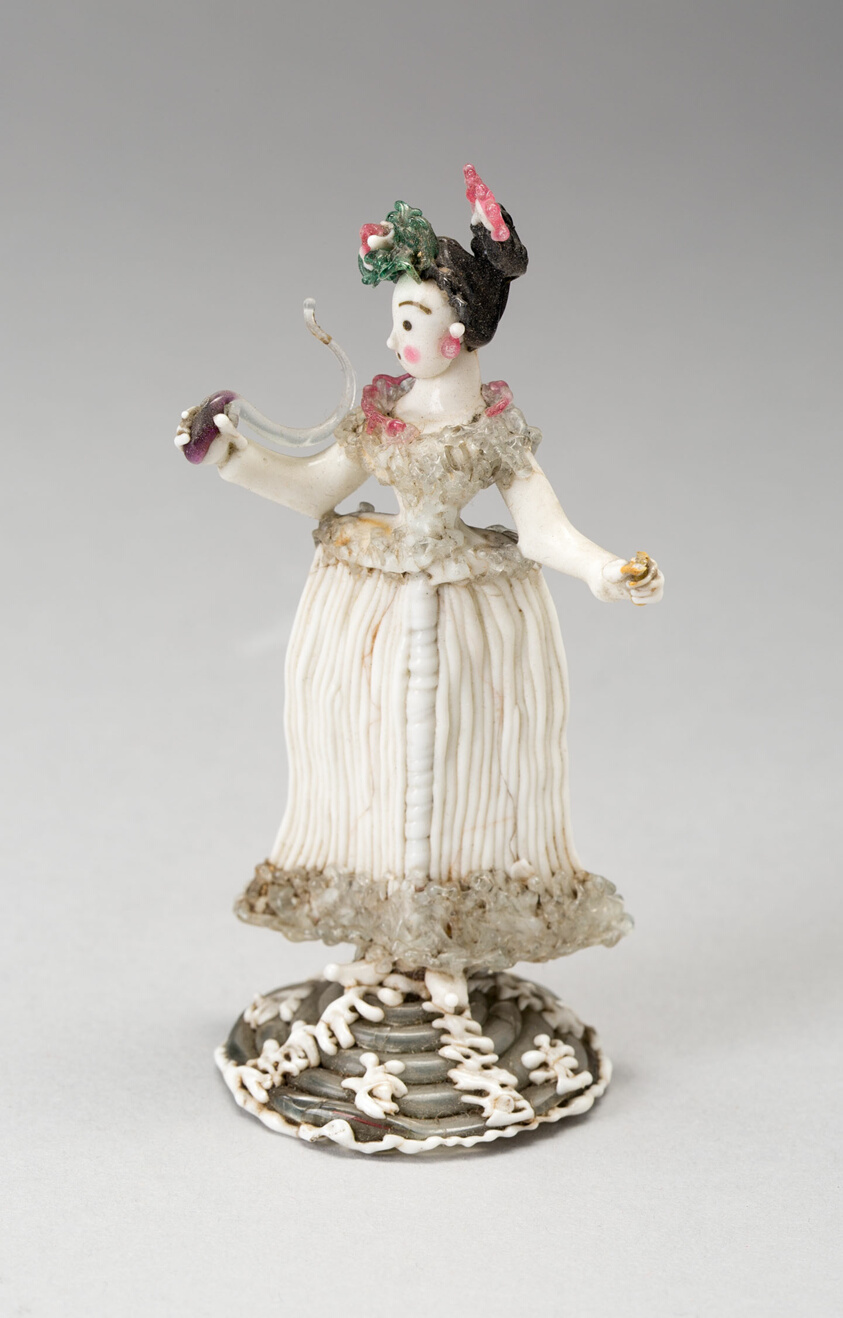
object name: Glass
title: Personification of Summer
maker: Nevers, France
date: 1750/99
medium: Glass; lampwork (verre de Nevers), metal armature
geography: France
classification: glass; miniature; decorative object/ornament; european decorative arts